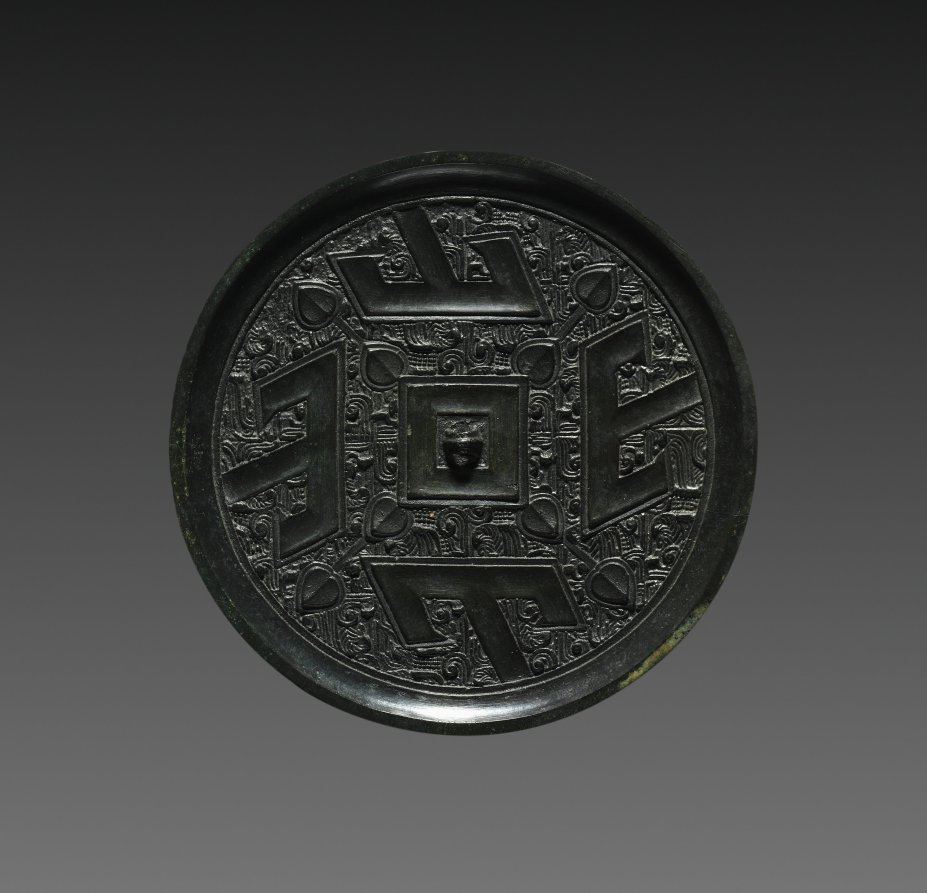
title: Mirror with Four T's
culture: China, Warring States period (475–221 BCE)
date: 300s BCE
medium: bronze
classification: Metalwork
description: The symbolic significance of the ancient Chinese mirror lies in its circular form and reflective quality that make it resemble the sun and the moon. "By the light of the sun, the world is made bright," so said a mirrorsmith. When the mirror was taken with its owner for use in the afterlife, it reflected the soul and brought eternal brightness to the next world.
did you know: The prominent T's on this mirror represent four gates in Chinese mythology that relate to transformation.